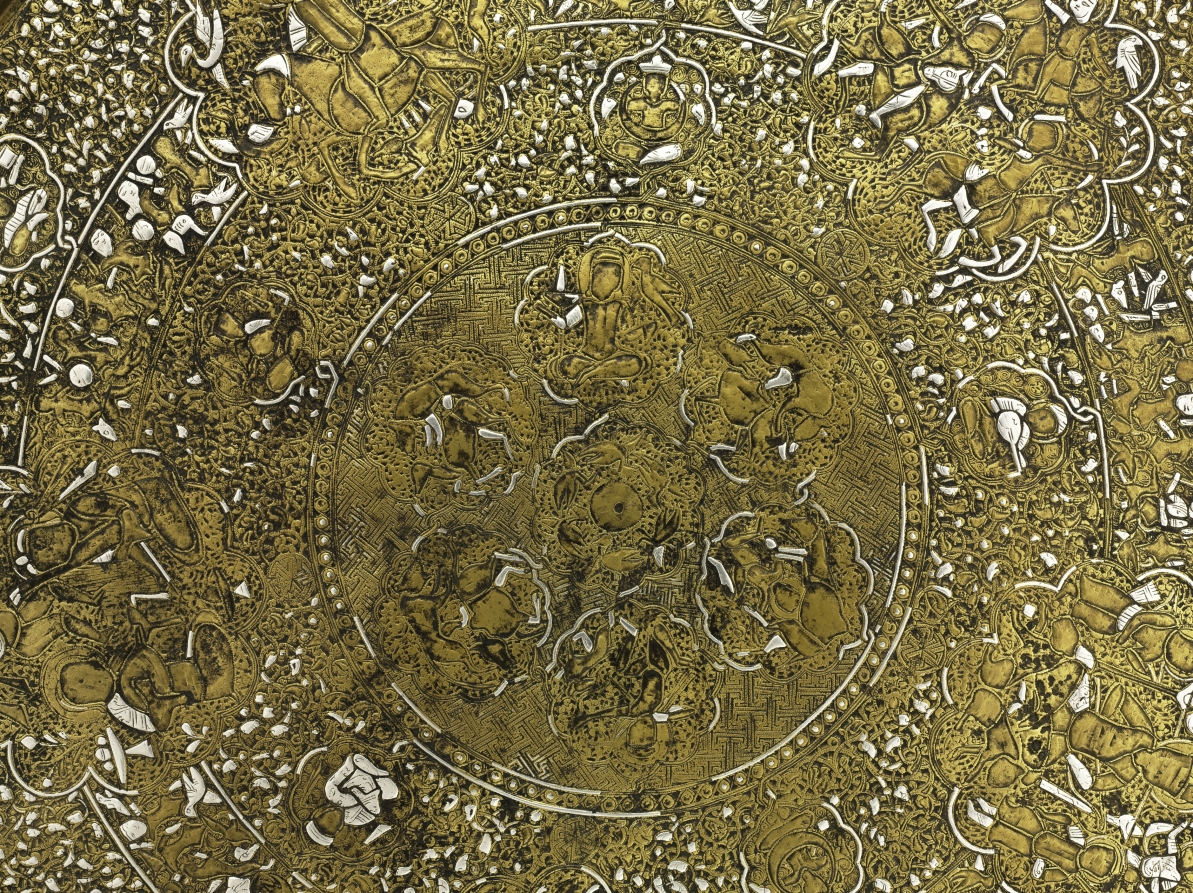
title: Tray Portraying Courtly Pleasures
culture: Syria, Ayyubid period (1171–1260)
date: 1240s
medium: sheet brass inlaid with silver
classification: Metalwork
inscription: The presence of ligatures in the narrow circular bands with interconnected human and animal figures suggests this may be a degenerate form of animated script. It is indecipherable.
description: This tray features images of courtly life interspersed with astronomical symbols. The scenes contained within large multilobed medallions display an enthroned prince with lions at his feet, a banquet, a hunt, dancers, and musicians. Contained within the concentric circles there are also references to solar and lunar motifs, including figures holding sunbursts and lunar crescents. This tray is made of a single sheet of brass and the silver inlay, which is best preserved on the tray’s inner curve, suggests its original brilliance.